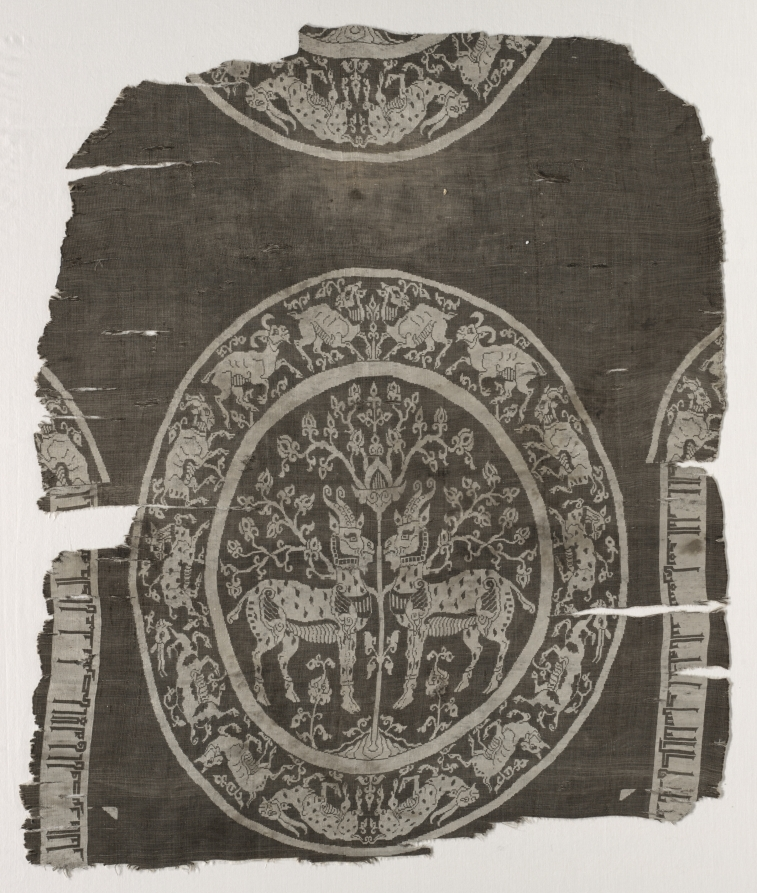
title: Fragment of Tomb Cover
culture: Iran or Iraq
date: before 1955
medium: Silk: double-face compound twill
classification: Textile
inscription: [al-maw]t bab wa-kull al-nas dakhiluhu ya layta shi-ri ba'd al-bab ma al-d[ar]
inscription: inna a[l-dar ja]nnah khalid[ah] in 'amilta bi-ma yardá al-Ilah wa-in qasarta fal-nar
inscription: fi sanati thaman wa-thamanin wa-thal[a]thami'ah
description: In ivory on a dark brown ground a large-scale roundel is framed by a frieze of running animals containing a pair of confronted ibex on either side of a tree of life. Above is preserved the bottom portion of an identical roundel, and to either side of the main roundel is a fragment from the upper part of a repeated roundel, interrupted by the inclusion of a vertical inscription band in Kufic lettering.